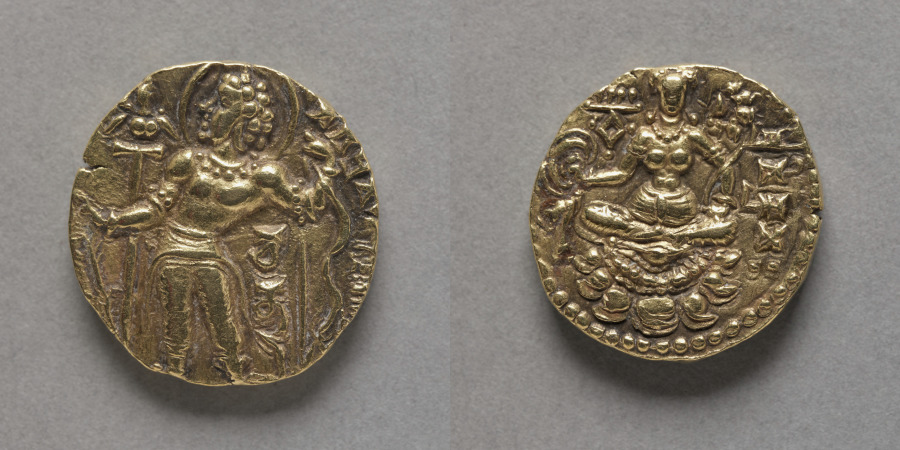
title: Coin of Chandragupta II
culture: India, Chandragupta II, Gupta Period, late 4th-early 5th century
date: c. 400 CE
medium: gold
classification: Coins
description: The rulers of the Gupta dynasty unified northern India under native rule for the first time since the Maurya empire (323-185 bc). The Guptas named themselves after Chandragupta, the founder of the Maurya dynasty. This coin of Chandragupta II, who ruled from around ad 380 to 415, depicts a divine archer holding a bow and arrow. On the reverse is the Indian goddess of good fortune, Shri, seated on a lotus.